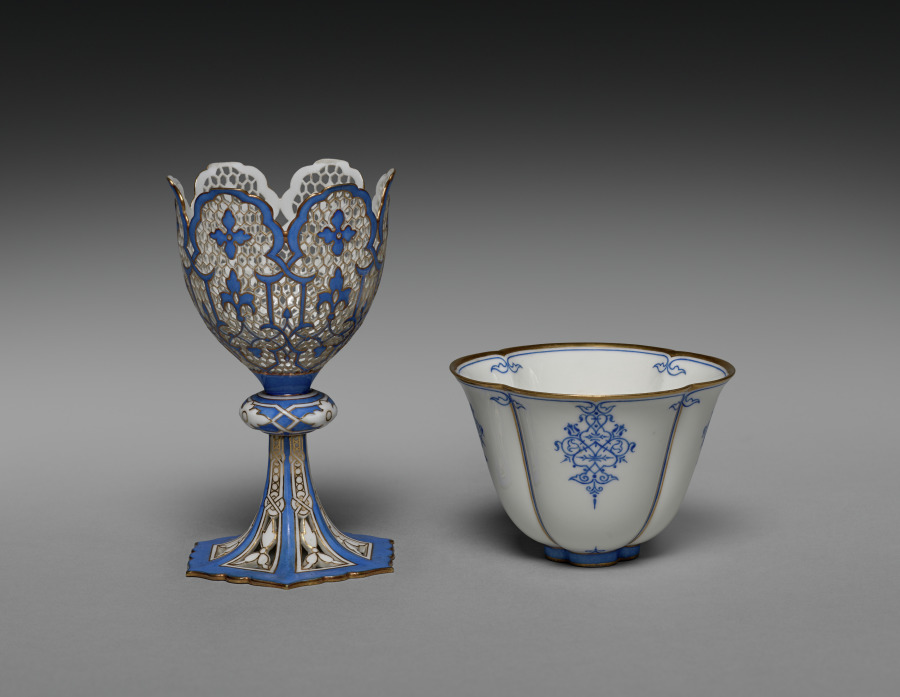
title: Cupholder (Zarf) and Cup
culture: France, Sèvres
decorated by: Guyonnet (French)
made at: Sèvres Porcelain Factory (French, est. 1756)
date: c. 1848–55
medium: hard-paste porcelain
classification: Ceramic